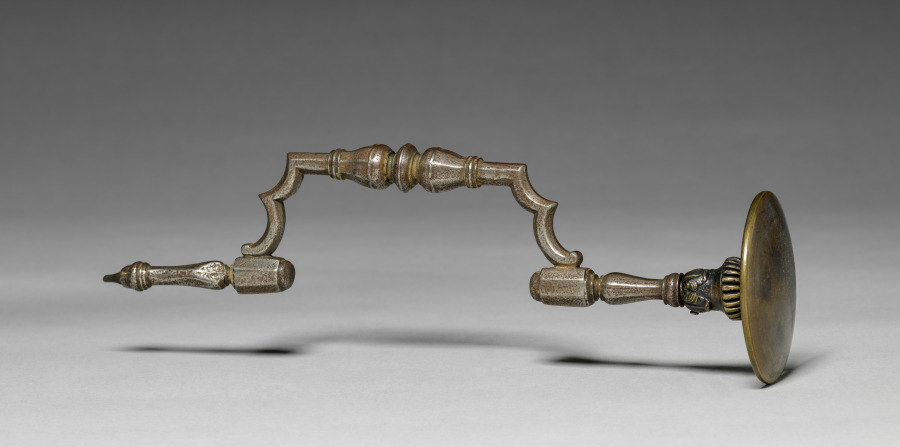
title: Hand Drill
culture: Europe, 17th century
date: 1600s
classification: Tool